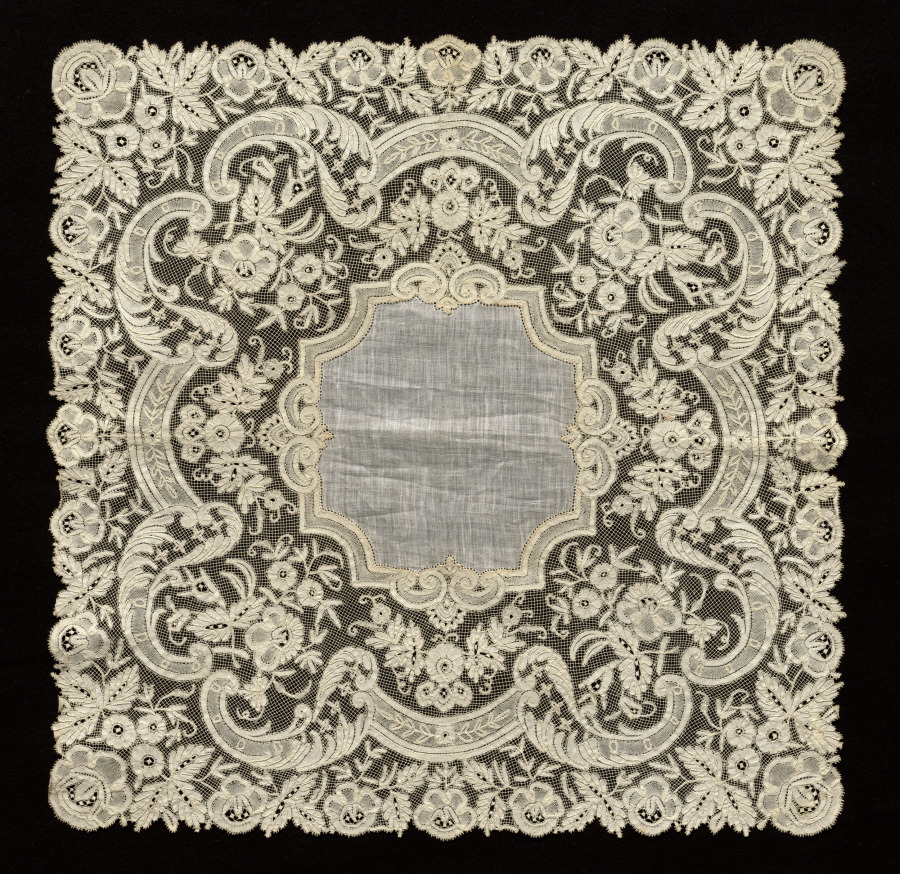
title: Lace Handkerchief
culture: Flanders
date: 1800s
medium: Plain weave linen center; bobbin lace border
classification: Lace